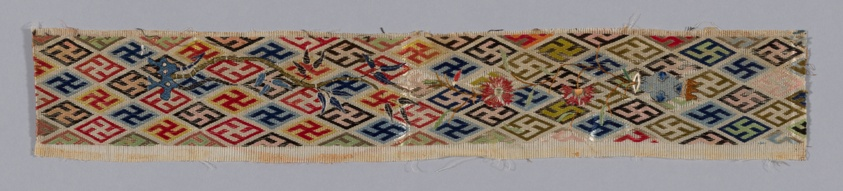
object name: Costume and Accessories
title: Band (from Woman's Trousers or Robe)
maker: China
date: 1875/1900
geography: China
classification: textile; needlework - costume; needlework (visual works); costume